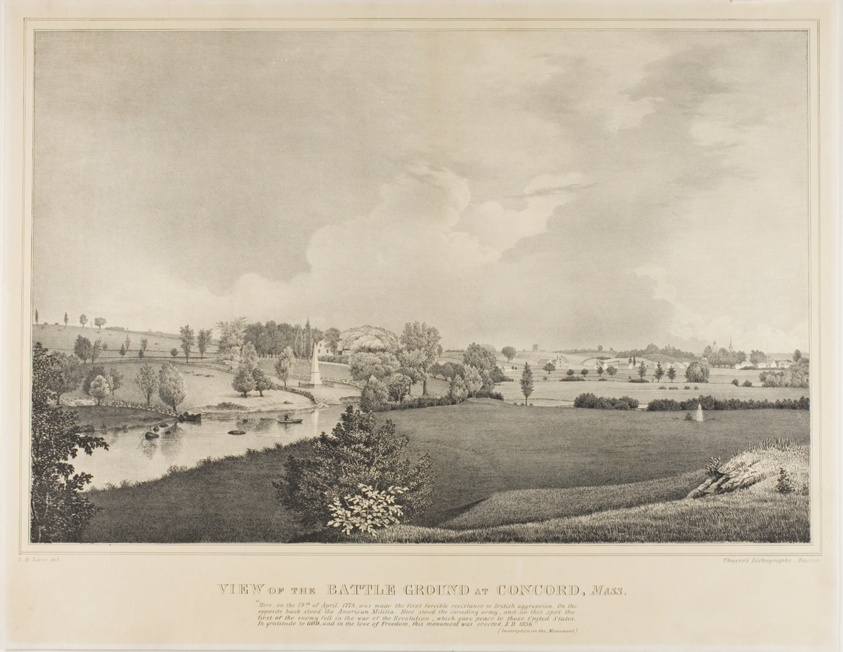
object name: Print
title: View of the Battle Ground at Concord, Massachusetts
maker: Fitz Hugh Lane (American, 1804-1865); published by Thayer's Lithography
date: c. 1850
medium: Lithograph with gray tintstone on ivory wove paper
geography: United States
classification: lithograph; print; prints and drawing